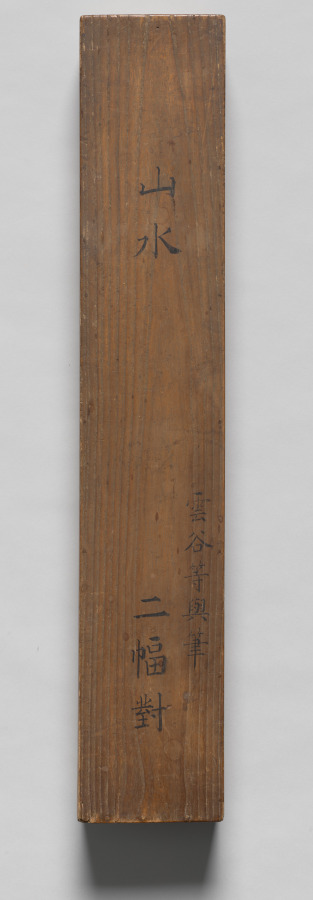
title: Landscapes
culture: Japan, Edo period (1615–1868)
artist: Unkoku Tōyo (Japanese, 1612–1688?)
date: mid- to late 1600s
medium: pair of hanging scrolls; ink and light color on paper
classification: Painting